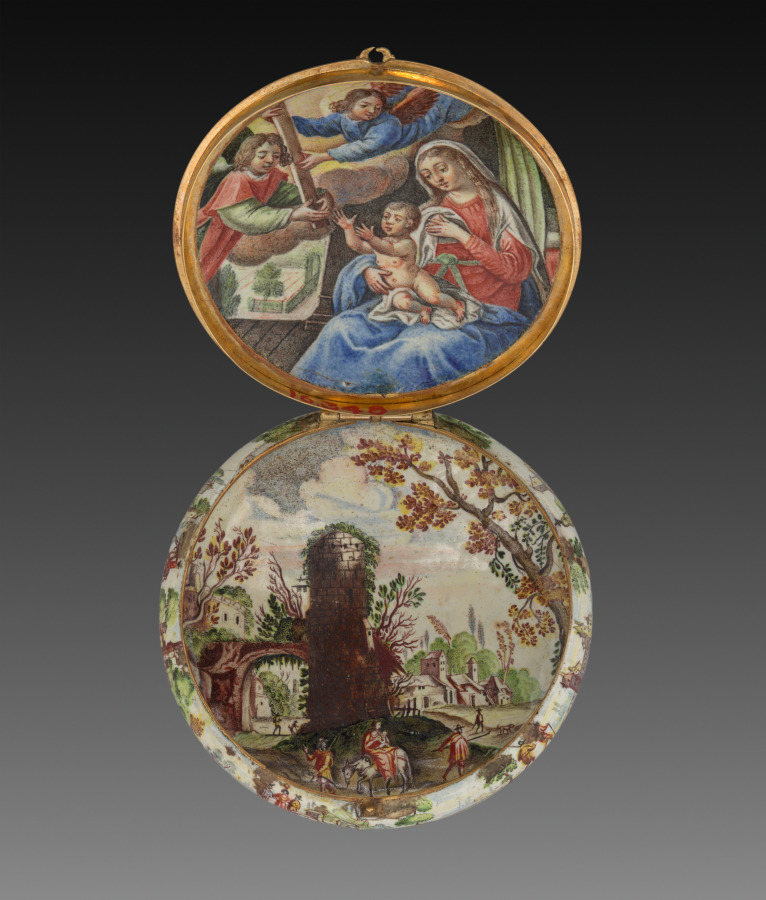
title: Watchcase (Boîtier de montre)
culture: France, 17th century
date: c. 1640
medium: gold and enamel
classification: Jewelry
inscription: [engraved on the rim]: "B8"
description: In the 1630s, the practice of painting with enamel on metal became a means for French miniature painters to achieve a more richly colored, durable product. Previously miniatures were painted with watercolor on vellum, a material made from animal skin. This case would have originally held a watch, but was later transformed into a simple box through the removal of the watch mechanism and ring. This watch case is richly painted inside and out with miniatures modeled after well-known religiously allegorical works.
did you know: Inspiration for the box’s miniatures was drawn from works by Peter Paul Rubens’ The Holy Family with Saints John the Baptist and Elizabeth (1615) (back panel) and Nicolas Cochin (interior base).